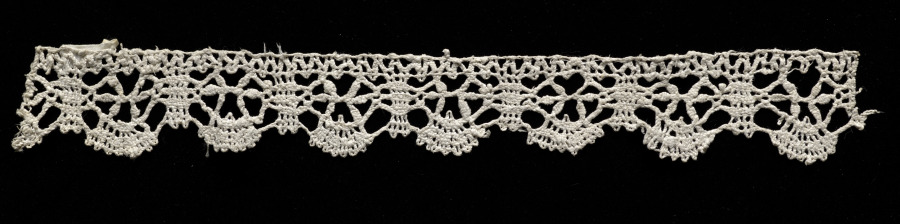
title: Lace Edging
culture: Italy, Genoa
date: 1700s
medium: Bobbin lace (rose lace)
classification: Lace